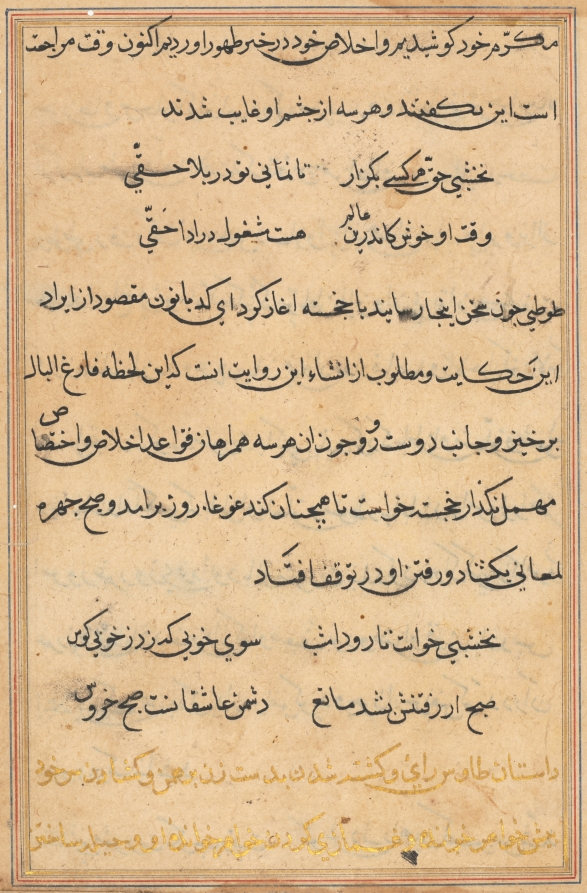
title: Page from Tales of a Parrot (Tuti-nama): text page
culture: Mughal India, court of Akbar (reigned 1556–1605)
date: c. 1560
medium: gum tempera, ink, and gold on paper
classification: Painting